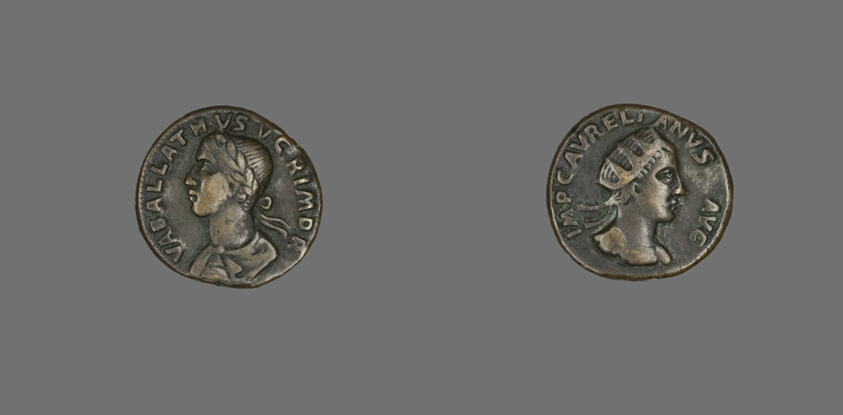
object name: Coin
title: Coin Portraying King Vabalathus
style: imperial (roman), ancient, roman (ancient, style or period)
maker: Roman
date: 270-275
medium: Bronze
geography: Roman Empire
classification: coin; ancient art